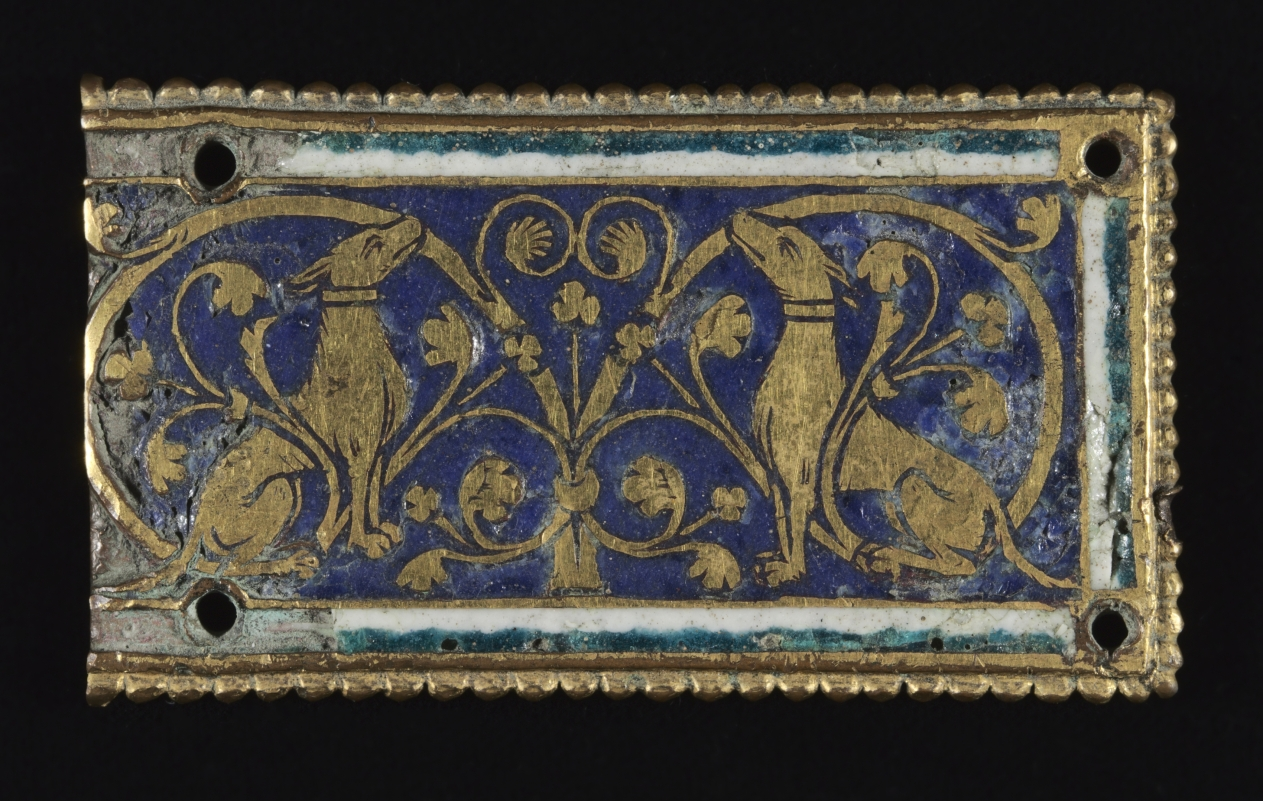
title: Plaque, probably from a Reliquary Shrine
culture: Mosan, Valley of the Meuse, Gothic period, early 13th century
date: c. 1200–1250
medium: gilded copper; champlevé enamel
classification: Enamel